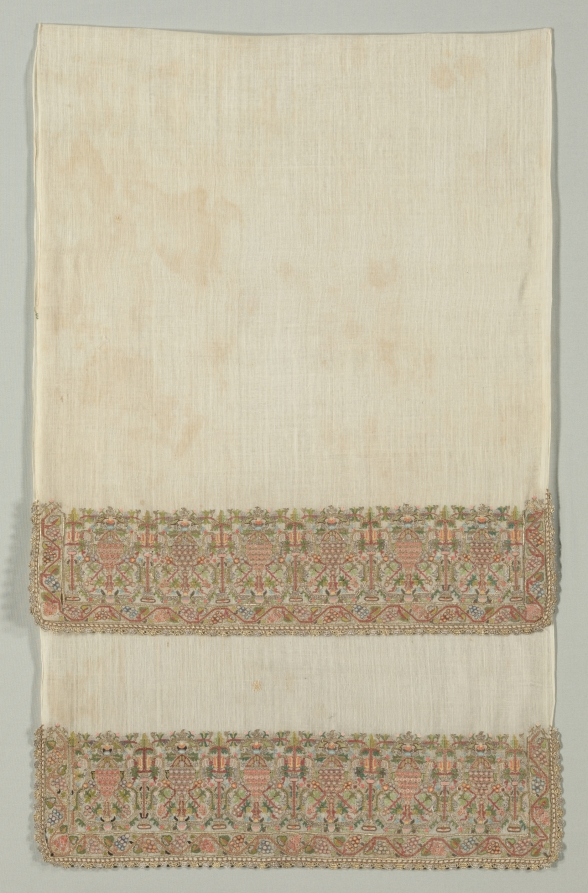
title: Embroidered Towel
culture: Turkey, 19th century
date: 19th century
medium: embroidery: silk and metal threads on linen tabby ground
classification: Embroidery